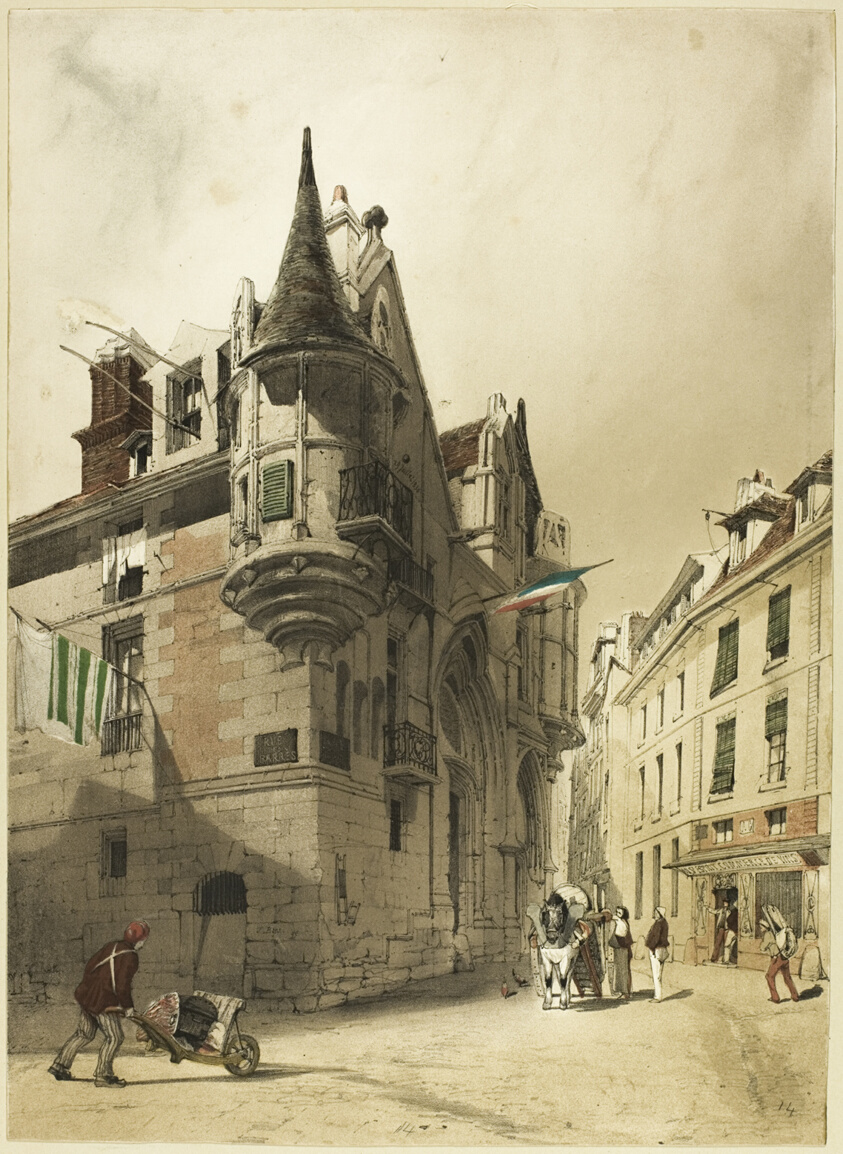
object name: Print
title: Hotel de Sens, Paris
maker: Thomas Shotter Boys (English, 1803-1874); published by Charles Joseph Hullmandel (English, 1789-1850)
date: 1839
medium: Color lithograph on paper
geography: England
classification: lithograph; print; prints and drawing